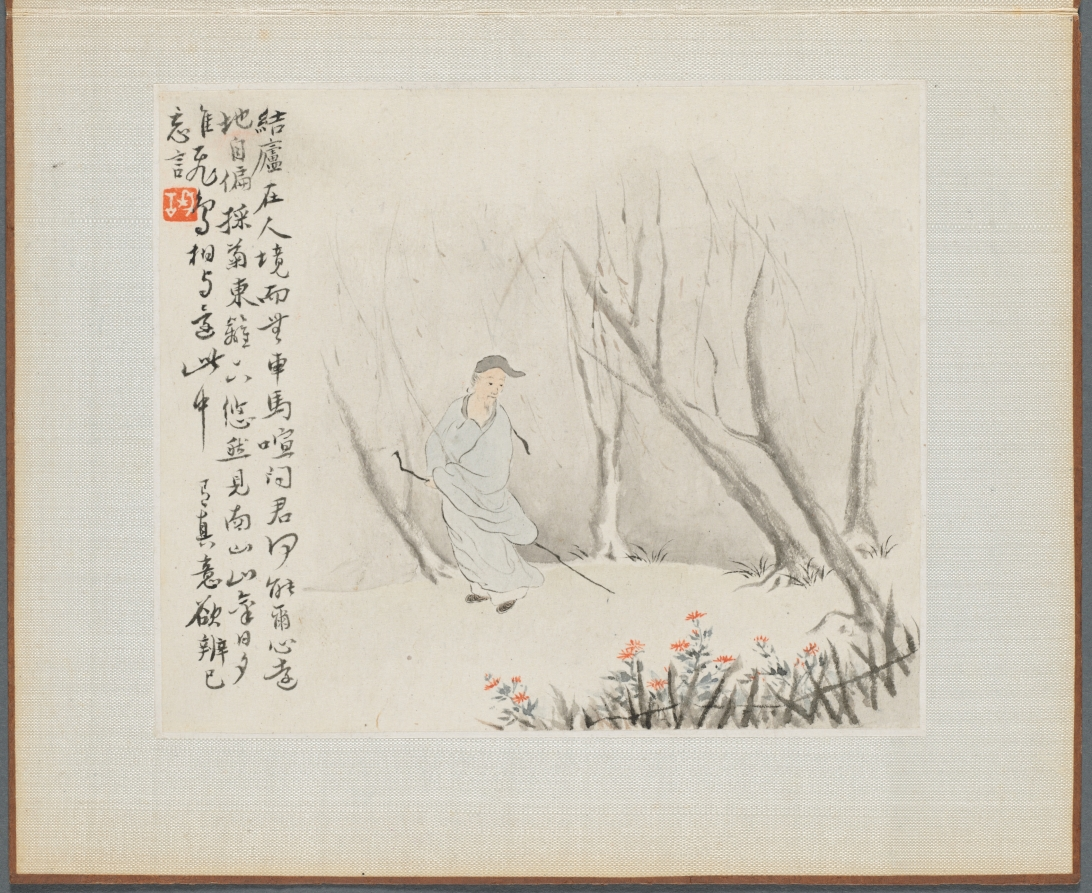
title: Album of Landscape Paintings Illustrating Old Poems: Man with a Staff Admires Chrysanthemums at a Fence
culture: China, Qing dynasty (1644-1911)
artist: Hua Yan (Chinese, 1682–c. 1765)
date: 1745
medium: Album leaf; ink and light color on paper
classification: Painting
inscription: Calligraphy to left of figure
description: Hua Yan’s painting of a gentleman admiring orange chrysanthemums evokes a quote from the poem Drinking Wine by poet and recluse Tao Qian (also called Tao Yuanming, AD 365–427): "I pluck chrysanthemums under the eastern fence, and serenely I gaze at the southern mountains."